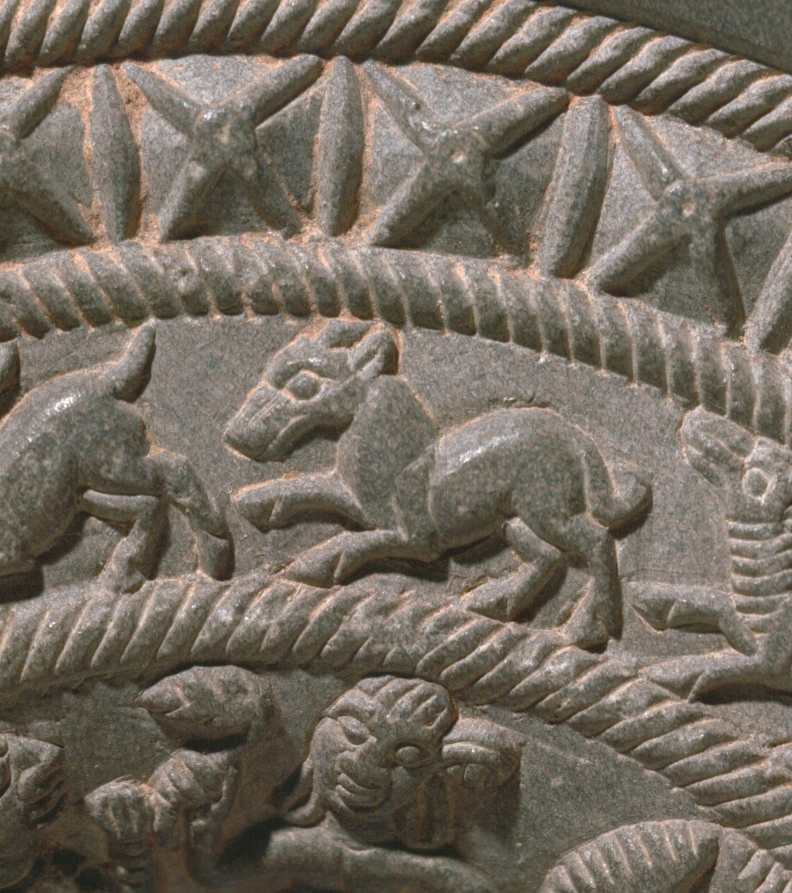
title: Ringstone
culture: India, Maurya period (322–185 BCE)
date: 200s BCE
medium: steatite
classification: Sculpture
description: Ringstones are among the earliest works of art to be created in stone during India's historical period. This example is finely carved with detailed images of affectionate couples and palm trees, running animals, and geometric motifs in concentric circles. The function of ringstones remains uncertain, since none of the surviving examples is inscribed or explained in a text.